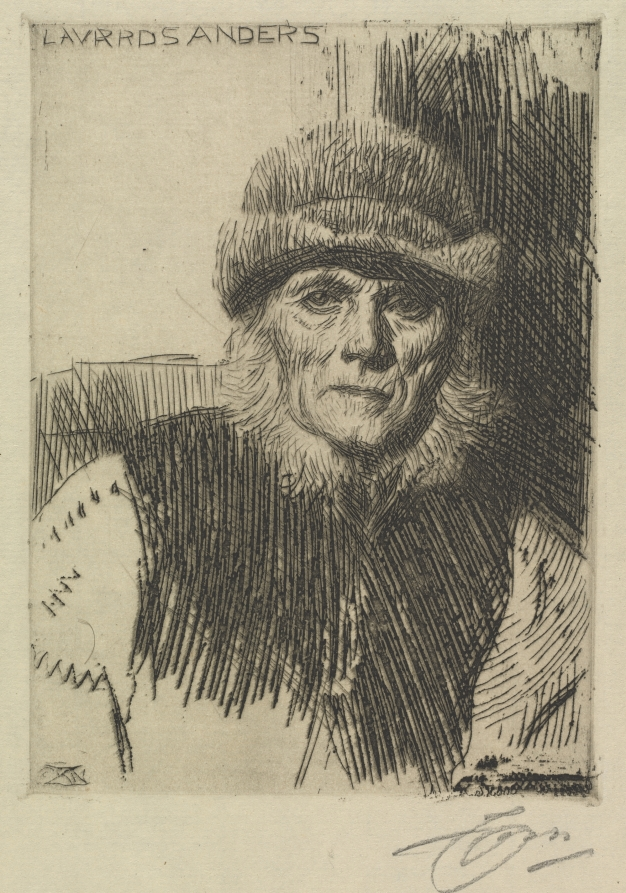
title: Dalecarlian Peasant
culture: Sweden, 20th century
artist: Anders Zorn (Swedish, 1860–1920)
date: 1919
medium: etching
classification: Print